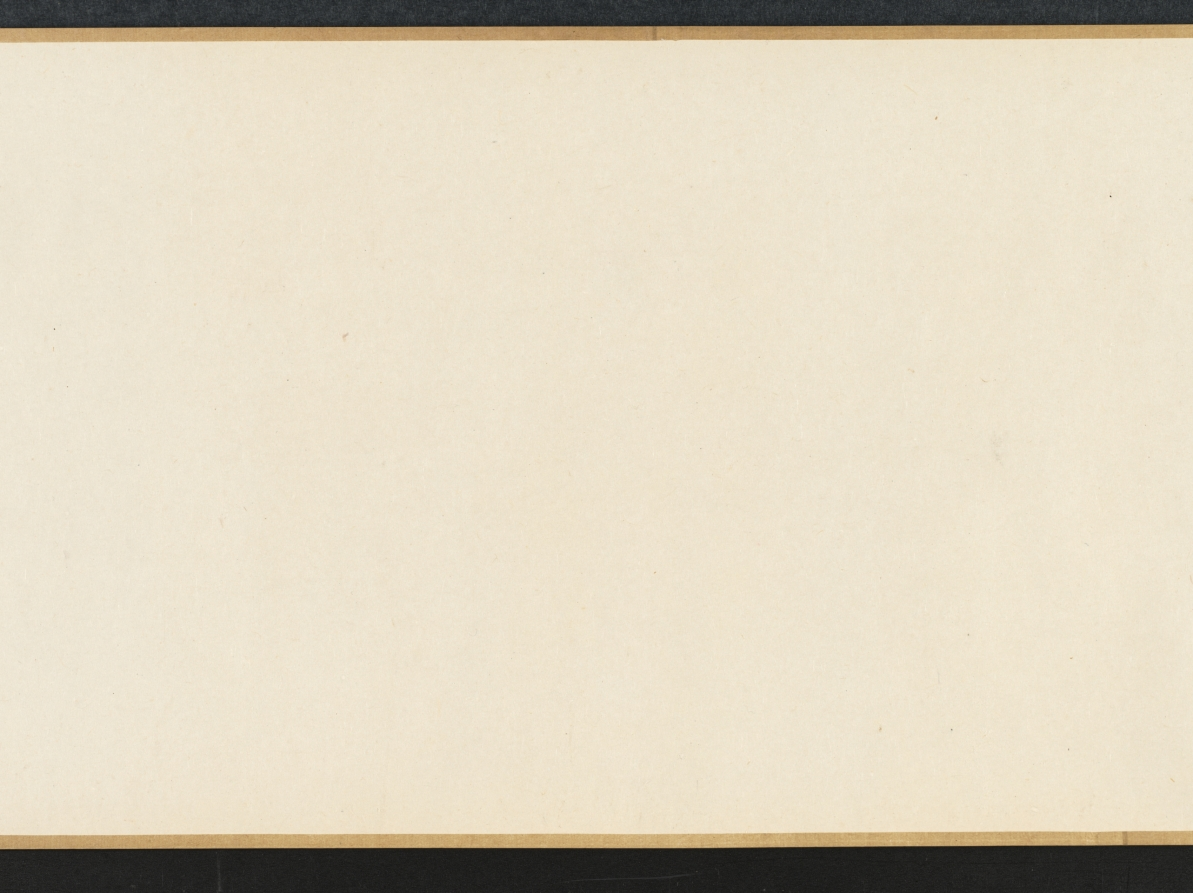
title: The Lantern Night Excursion of Zhong Kui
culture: China, Yuan dynasty (1271-1368)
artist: Yan Hui (Chinese, active 1270–1310)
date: late 1200s–early 1300s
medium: handscroll; ink and slight color on silk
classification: Painting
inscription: Artist's signature [and probable seal]: Yan Qiuyue 顏秋月 Title on frontispiece and 1 seal of Niu Shuyu 鈕樹玉 (1760–1827): Qiuyue mohuan 秋月墨幻 [Qiuyue's Ink Fantasy]. 31 additional seals: 2 of Yang Shiqi 楊士奇 (1365–1444); 2 of An Guo 安國 (1481–1534); 8 of Xiang Yuanbian 項元汴 (1525–1590); 2 of Geng Zhaozhong 耿昭忠 (1640–1686); 4 of Pu Tung 溥侗 (1870–1952); 7 of Tan Jing 譚敬 (1911–1991); 1 of Liu Ting-chih (20th c.); 5 unidentified.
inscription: An inscription by Zizhi Shanren 紫芝山人 [probably Jiang Hui 蔣惠], dated 1389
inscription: An inscription by Wu Kuan 吳寬 (1436–1504)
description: Here, the demon queller Zhong Kui leads a nightly procession of street entertainers with bare, muscular bodies and demonic faces. Some wear shabby clothes, and all perform stunts and tricks to astound and scare the viewer. In fact, a New Year custom in cities of southeast China had the poor, disguised as demons, process through the streets and play their tricks to clear households of evil spirits and welcome the spring. From right to left, a demonic figure leads the procession and beats a drum; another lifts a large rock; one stands on his hands trying to drink; one balances a jar on his elbow; three hold and wield weapons; one carries a folded chair covered by a cow’s skin; another holds Zhong Kui’s qin (zither), books, brush, and inkstone. At the end of the scroll, two figures offer a cup and bottle of wine to Zhong Kui, who lifts his hand in command.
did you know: Zhong Kui was an ancient ghostbuster.